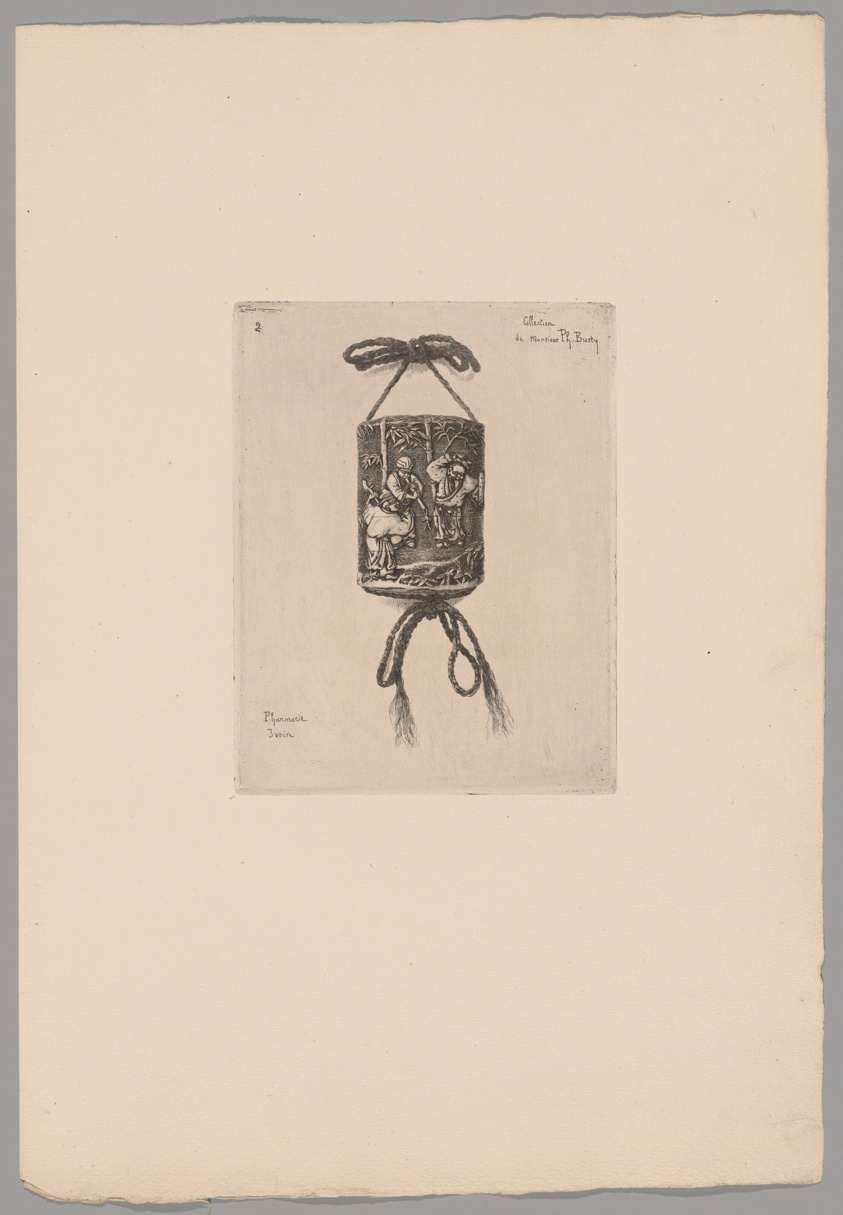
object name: Print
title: Japonisme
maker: Felix Hilaire Buhot; French, 1847-1898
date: 1883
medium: Etching in black ink on cream laid paper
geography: France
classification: prints and drawing; etching; paper; print